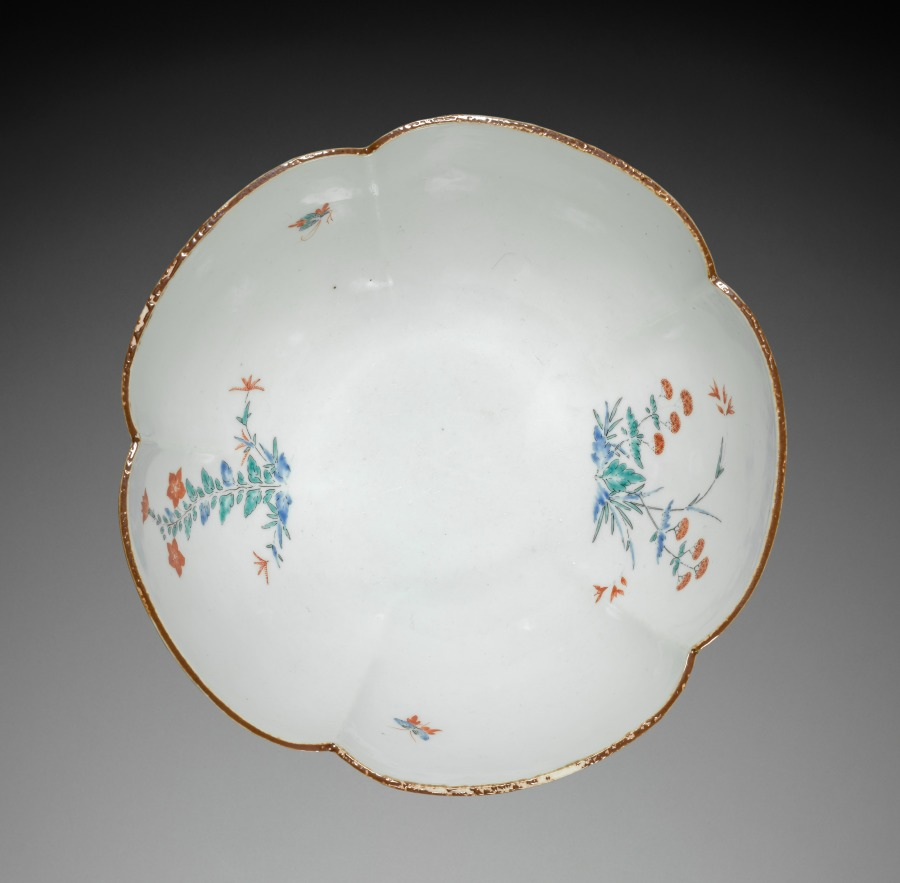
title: Bowl with Butterflies and Flowers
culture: Japan, Edo period (1615–1868)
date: c. 1700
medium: porcelain molded in five lobes, with overglaze color enamel (Hizen ware, Kakiemon type)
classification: Ceramic